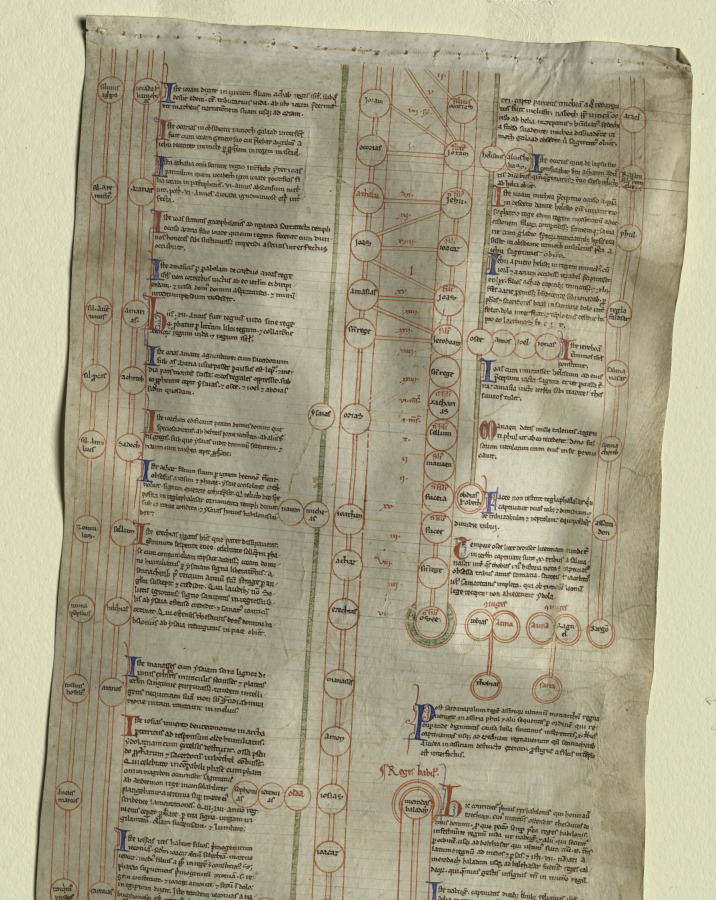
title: Peter of Poitiers's "Compendium Historiae in Genealogia Christi"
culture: England, Canterbury, 13th century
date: c. 1220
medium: ink and tempera on a vellum roll of four membranes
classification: Manuscript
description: This manuscript roll, composed of four membranes formerly stitched together in a continuous roll about nine feet long, has been divided in the middle for easier visibility and study. The text is an abridgment of biblical history focused on the descent of Christ from Adam. It was written by Peter of Poitiers (about 1130–1205), who taught theology and history in Paris and was widely copied. The present roll is an English copy of Peter's text made shortly after his death. Although manuscript rolls were hung on the walls of a classroom as instructional aids to students, some of them have value beyond their textual and historical interest because of the fine quality of their drawings, as seen here. A comparison with Canterbury manuscripts and stained glass of around 1220 is the basis for the attribution to Canterbury. Peter of Poitiers's aim in this project was to assist students prevented from mastering biblical history because of its length and because they were too poor to own books. His text on roll is the briefest possible summary of biblical history. It is arranged in six historical stages, denoting the six ages of the world, as decreed by theological tradition. The first five ages were inaugurated by Old Testament individuals: Adam, Noah, Abraham, David, and Sedecias. The birth of Christ heralded the sixth stage. Beginning at the top of the first membrane, the text consists of brief biographical entries on the ancestors of Christ (Adam, Noah, Abraham, Moses, and David) and other biblical personalities. These extend to the birth of Christ on the fourth membrane, ending with accounts of Hebrew and Roman kings and the Apostles. Each compendium shows the names of the ancestors inscribed within circles, those of direct descent placed vertically in a central column, others scattered in clusters to the right and left. The decoration of the roll consists of a series of medallions of diverse geometrical frames filled with either a figural drawing or a diagram. The style of these pen-and-ink drawings, some illuminated in tempera or tinted with wash, stems from English manuscript and glass painting attributed to the school of Canterbury Cathedral. The style of the museum's illustrations is so close to the stained glass panels made for Trinity Chapel at Canterbury (about 1220) to suggest that an artist active as a glazier in the Cathedral workshop may also have executed the manuscript. In the least, the painter of the roll manuscript was familiar with the style of the painted glass, and on this basis, a date of about 1220 seems appropriate. Additional evidence is supplied by a psalter illuminated at Canterbury shortly before 1220. The figurative scenes in this psalter were apparently illustrated by the same hand that executed the line and wash drawings in the museum's roll.